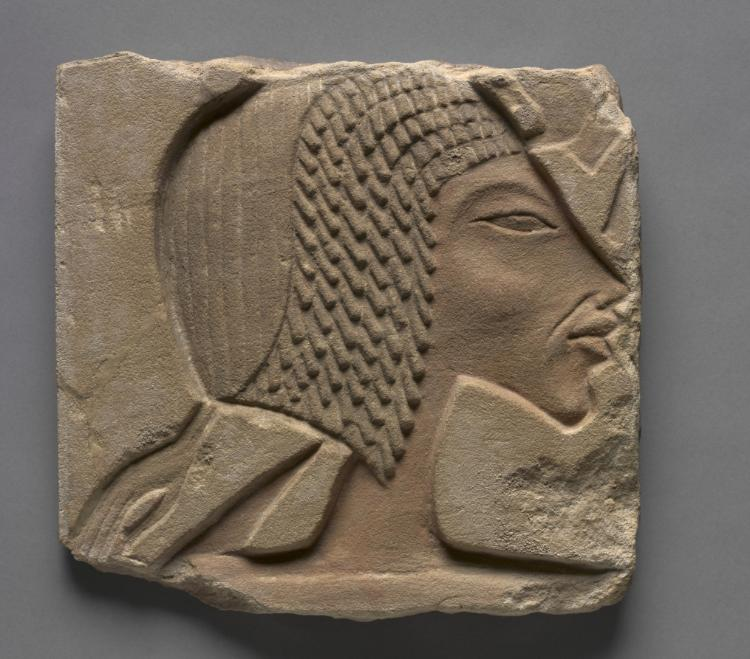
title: Talatat: Portrait of Nefertiti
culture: Egypt, Karnak, New Kingdom (1540–1069 BCE), Dynasty 18, reign of Akhenaten (1351–1334 BCE)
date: c. 1353–1347 BCE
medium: painted sandstone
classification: Sculpture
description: The son of Amenhotep III, Akenhaten, brought about the short-lived "monotheistic" revolution in Egyptian religion near the end of Dynasty 18. The young king constructed a temple complex to the Aten, the Sun Disk, at Karnak—from which this relief comes—before he moved his capital to El Amarna. For reasons yet unknown, the figure of the Queen Nefertiti appears in these reliefs far more often that that of the king. Ironically, the Aten temples were dismantled to be used as foundations and fill for additions to the Great Temple of Amun, whom the Aten had briefly displaced.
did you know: This relief comes from the short end of a talatat, a limestone block of standardized size used during the 18th Dynasty reign of the Pharaoh Akhenaten in the building of the Aton temples at Karnak and Akhetaten. The standardized size and their small weight made construction more efficient.